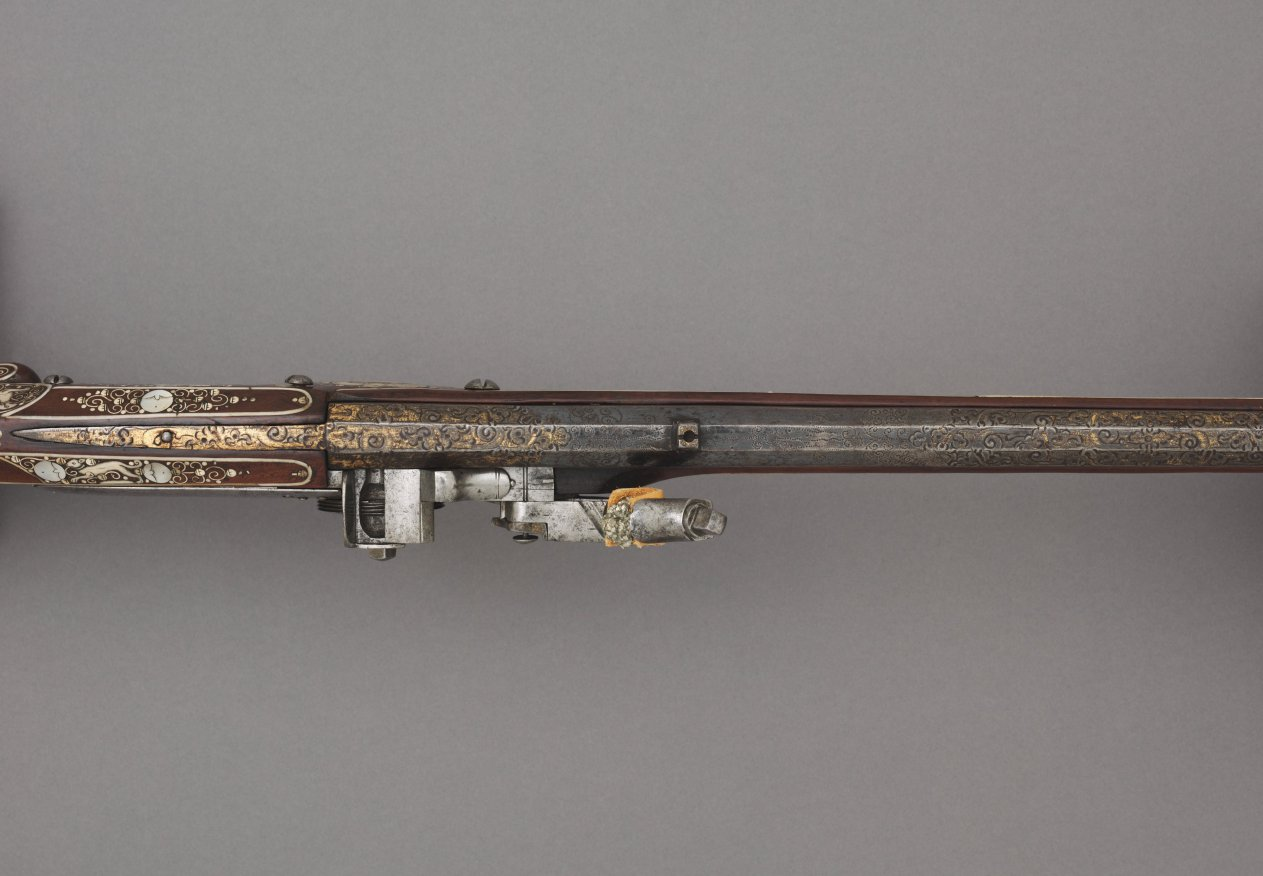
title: Wheel-lock Petronel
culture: Silesia (Southwestern Poland), Teschen, 17th century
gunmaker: Georg Kurland (Polish)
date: c. 1630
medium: steel, gilding, and wood inlaid with elk horn, ivory, and mother-of-pearl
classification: Arms and Armor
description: A petronel was a type of long pistol made with a wheel-lock ignition. Despite its length, the petronel was fired at the wrist like a pistol and not at the shoulder like a rifle. They were generally made in pairs during the early 1600s. Civilian versions were elaborately decorated for aristocratic clients.